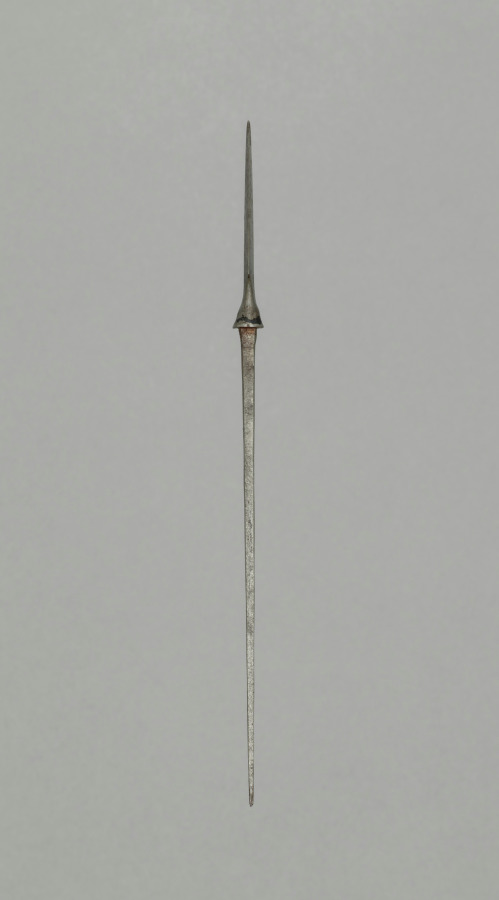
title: Arrow Point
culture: Japan, Edo period (1615–1868)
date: 1700s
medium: steel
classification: Arms and Armor